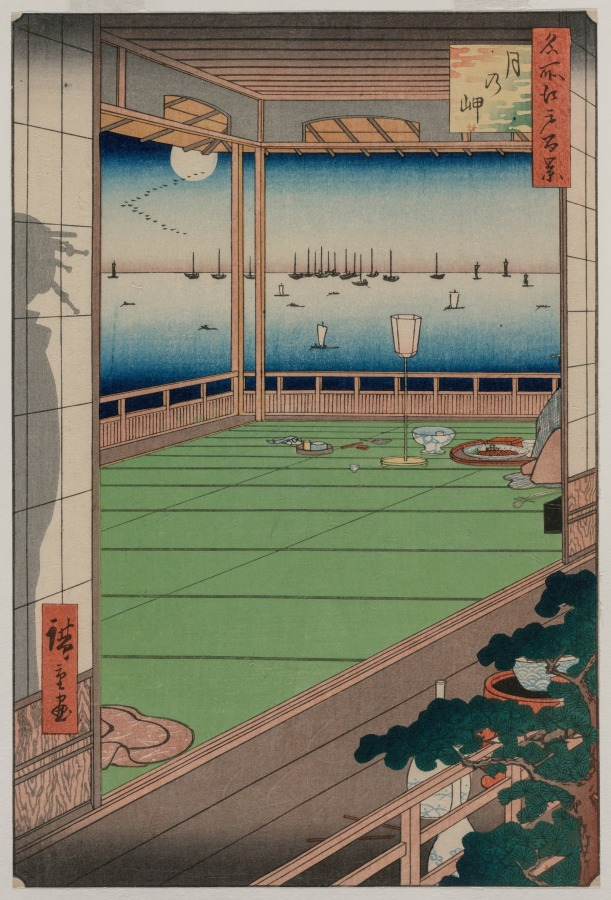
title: The Moon-Viewing Promontory, from One Hundred Views of Famous Places in Edo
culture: Japan, Edo period (1615–1868)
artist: Utagawa Hiroshige (Japanese, 1797–1858)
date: 1857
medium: color woodblock print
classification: Print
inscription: Signature: Hiroshige ga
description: Here, Utagawa Hiroshige’s design places the viewer by pine trees, peering beyond a doorway at the end of a moon-viewing party. The silhouette of a figure with an elaborate hairstyle is visible through a translucent paper door; only the person’s hem trails into view. Another individual remains seated on the floor in the upper right, near a musical instrument and a tray with blue-and-white ceramics, possibly still admiring the autumn moon over ships in Edo (now Tokyo) Bay.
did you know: Beginning in the 700s, the Japanese held moon-viewing parties in celebration of the full moon during the late summer and autumn months. A full moon is visible in this print.